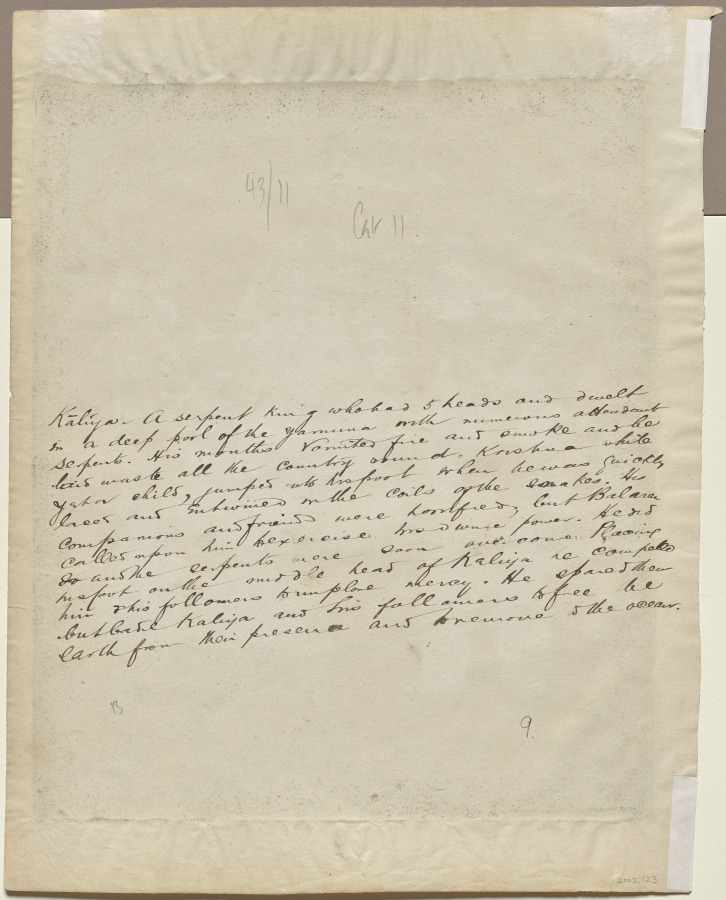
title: Rai Raja, from a Kalighat album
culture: Eastern India, Bengal, Kolkata, Kalighat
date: c. 1890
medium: Gum tempera, graphite, and ink on paper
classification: Painting